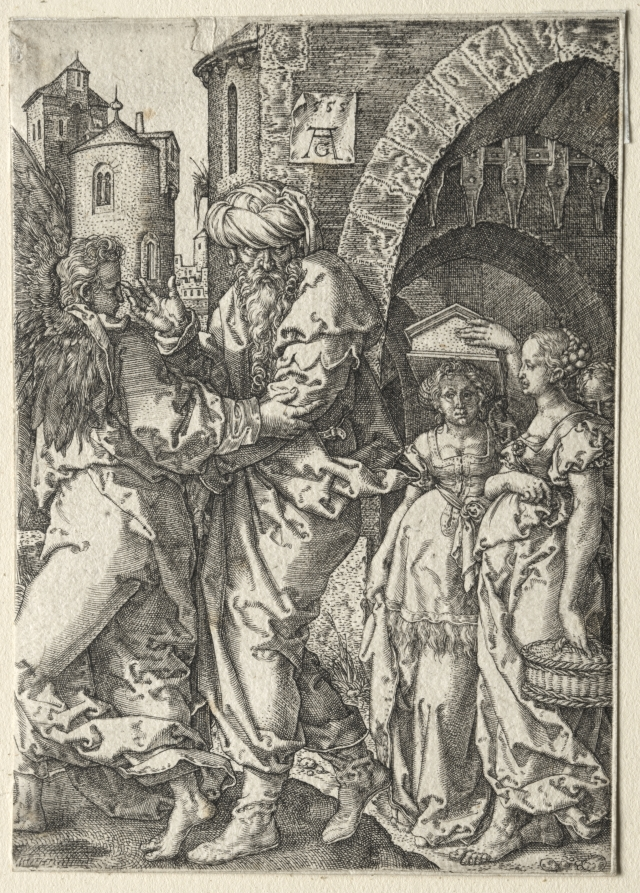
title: The Story of Lot: Lot and His Family Fleeing Sodom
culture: Germany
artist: Heinrich Aldegrever (German, 1502–1555/61)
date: 1555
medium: engraving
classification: Print